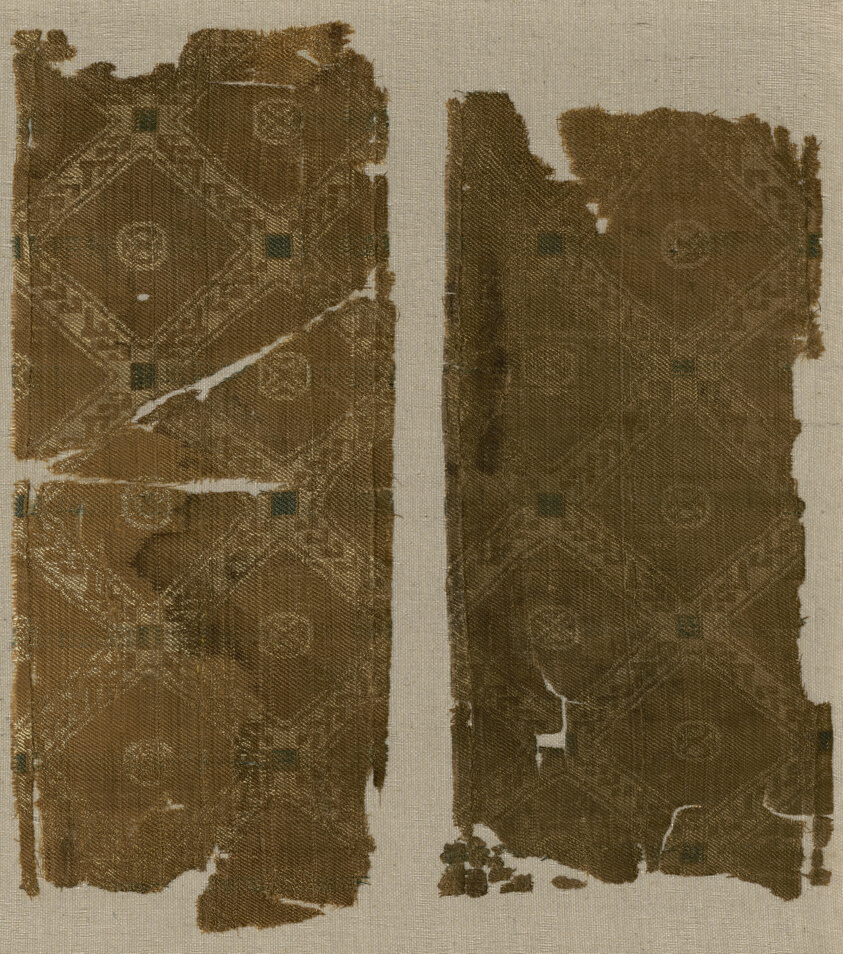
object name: Textile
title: Two Border Fragments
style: roman period (egyptian)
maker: Egypt, Akhmin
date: Roman period (30 B.C.– 641 A.D.), 5th/6th century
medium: Silk, weft-float faced twill weave of three-color complementary weft and inner warps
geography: Egypt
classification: textile; weaving